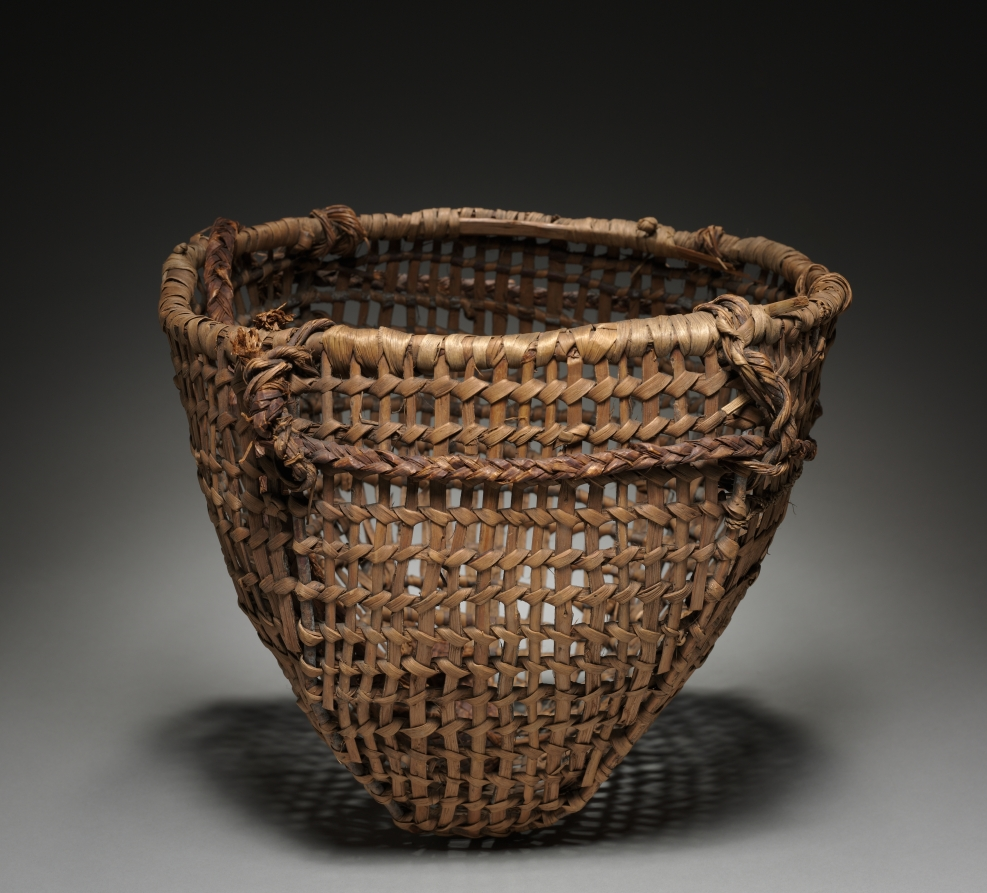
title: Clam basket with Tump Line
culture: Northwest Coast, Klallam, late 19th century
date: late 1800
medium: Cedar root; openwork, braided, plaited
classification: Basketry